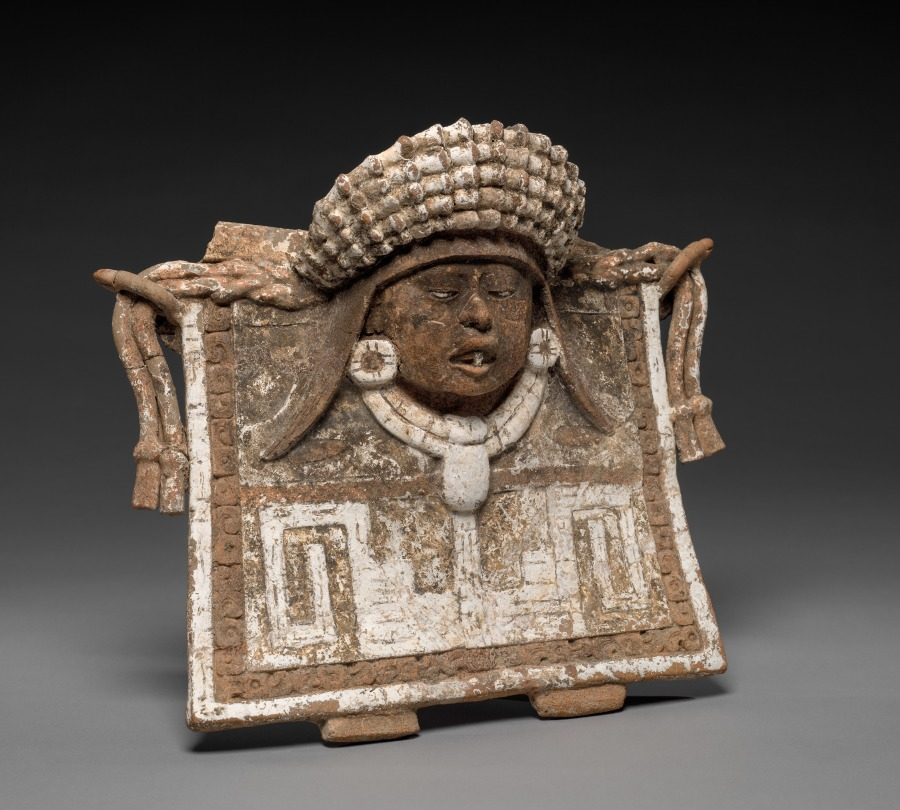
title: Standing Female Figure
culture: Mesoamerica, Veracruz, Nopiloa style?, 7th-10th century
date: 600–1000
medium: ceramic, pigment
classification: Sculpture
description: Ancient Veracruz artists used ceramic to create figural sculptures in a range of sizes, styles, and types. This beautiful, finely wrought female figure is an exceptional example. Although her identity is unknown, her adornments signal high status: ear ornaments, a large necklace, an elaborate dress that drapes over her outstretched arms, and perhaps even her front teeth, filed into a T shape, may have symbolic importance. The unfinished back, with a tripod support, suggests that the figure was meant to be seen from the front.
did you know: This lovely female’s body is a flat plaque supported by a tripod at the rear.